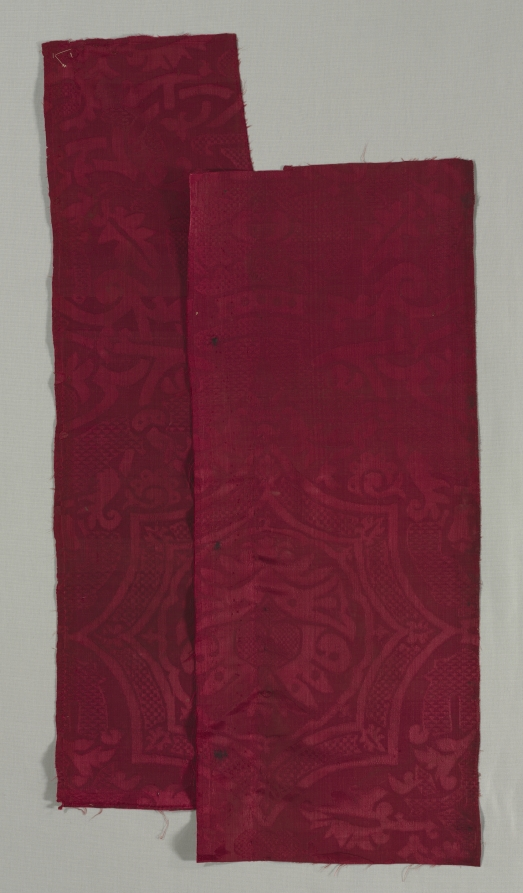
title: Silk Fragment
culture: Spain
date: 1500s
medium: fancy satin weave: silk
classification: Textile